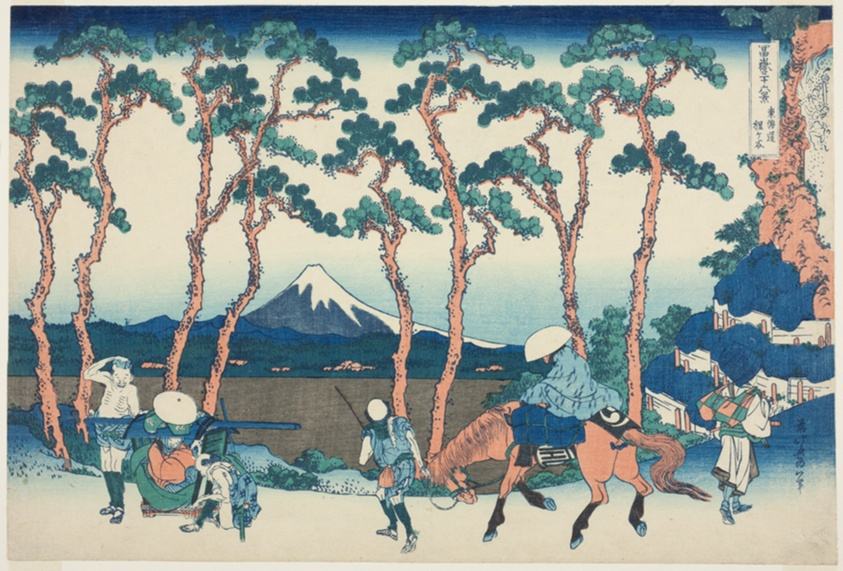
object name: Print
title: Hodogaya on the Tokaido (Tokaido Hodogaya), from the series "Thirty-six Views of Mount Fuji (Fugaku sanjurokkei)"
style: Japanese (culture or style)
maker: Katsushika Hokusai 葛飾 北斎; Japanese, 1760-1849; Publisher: Hibino Yohachi; Japanese, unknown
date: c. 1830/33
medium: Color woodblock print; oban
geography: Japan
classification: woodblock print; print; asian art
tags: landscapes